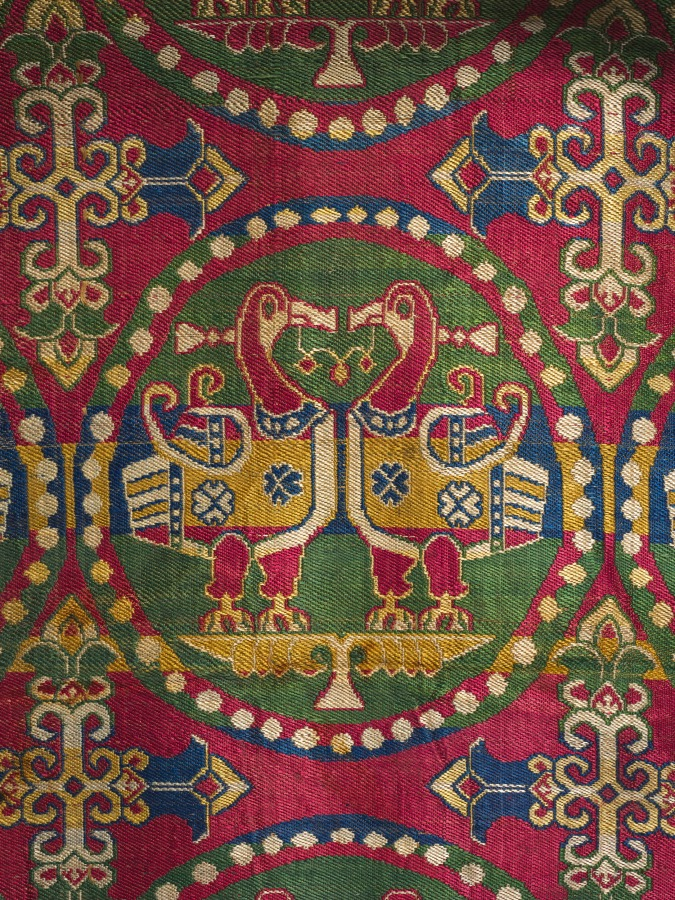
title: Child’s Coat with Ducks in Pearl Medallions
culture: Probably Sogdia (present-day Uzbekistan); China, Tang dynasty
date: 700s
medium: Silk: weft-faced compound twill weave (samite)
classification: Garment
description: The coat’s outer fabric is woven in five brilliant colors featuring paired ducks in pearl roundels, hallmarks of the precious and highly desired silks from Sogdia. The coat’s inner lining is a twill damask with a floral pattern made in China. The combination of Sogdian and Chinese silks in one garment with Tibetan ownership history is evidence of the vital exchange and cultural interaction among the peoples living along the trade routes of the Silk Road. This precious coat was presumably made for a Tibetan prince. Given the coat’s pristine condition, though, it is unclear whether the garment was ever worn, or was used as a diplomatic gift or perhaps as currency.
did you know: This coat is part of a set of garments that originally included an outer pair of pants and silk boots made from the same fabric.